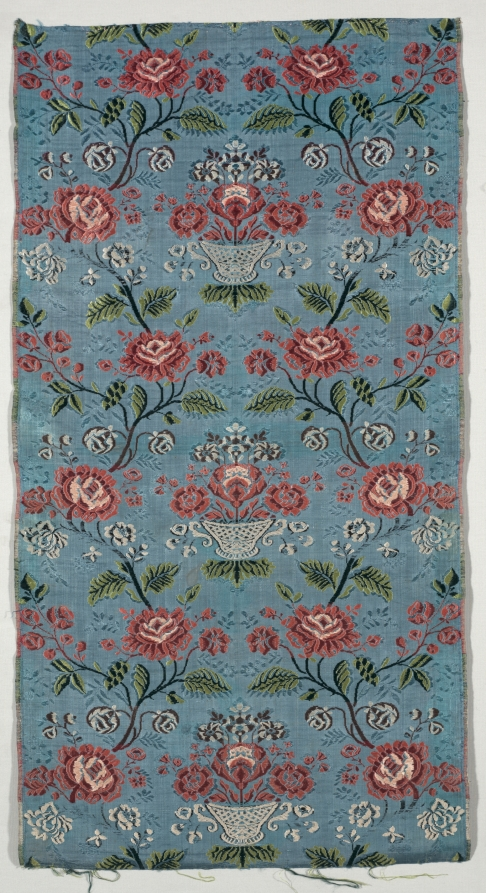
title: Length of Brocaded Silk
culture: Italy, 18th century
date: 1700s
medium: lampas weave, brocaded; silk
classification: Textile